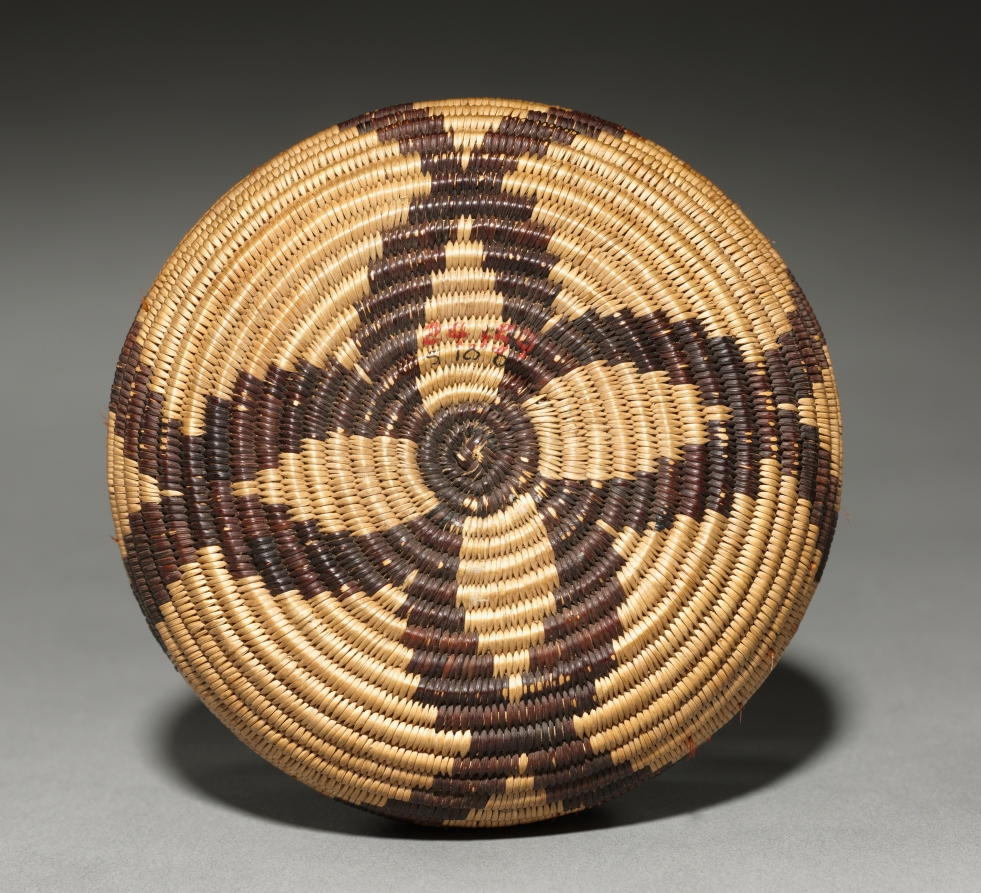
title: Bowl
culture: California, Pomo, Late 19th- Early 20th century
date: 1890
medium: Undyed Bulrush, Sedge; Coiled (3 rods)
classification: Basketry